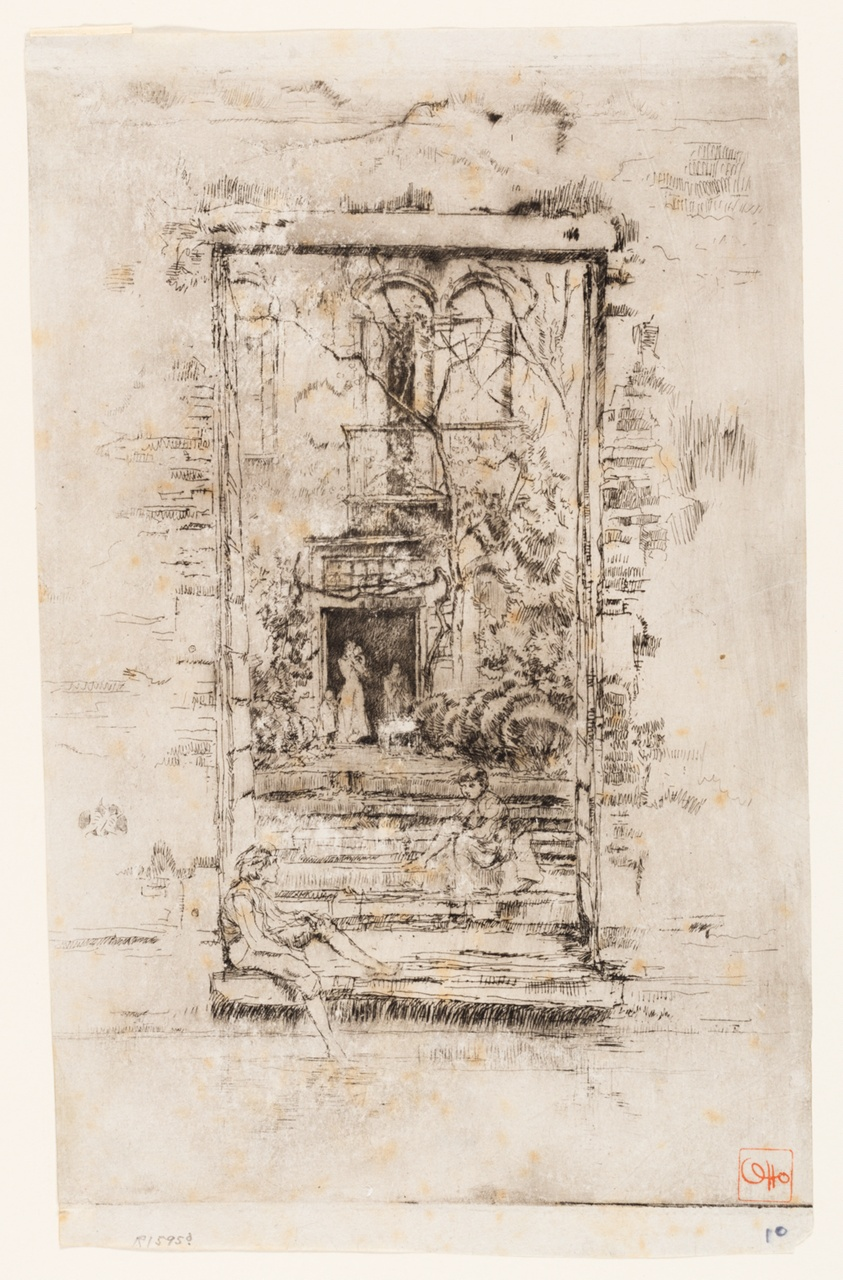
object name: Print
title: The Garden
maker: James McNeill Whistler (American, 1834-1903)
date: 1879/80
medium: Etching and drypoint in black ink on off-white Japanese paper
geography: United States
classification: etching; drypoint; print; prints and drawing; paper